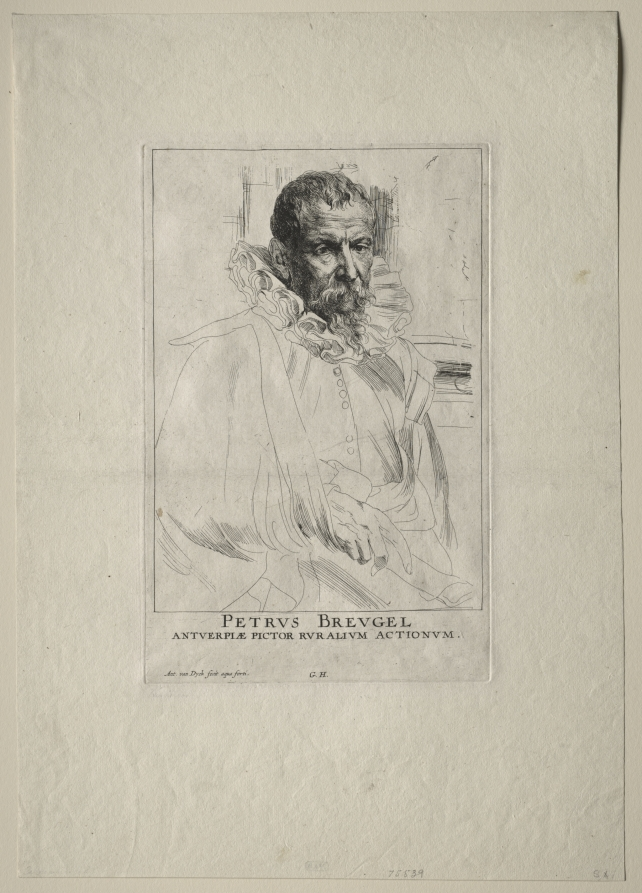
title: Pieter Breughel the Younger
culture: Flanders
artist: Anthony van Dyck (Flemish, 1599–1641)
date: 1630–33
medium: etching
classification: Print